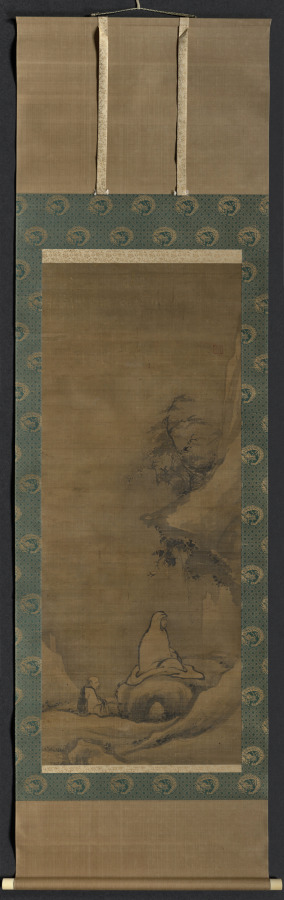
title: Bodhidharma Meditating Facing a Cliff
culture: China, Song dynasty (960-1279)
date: late 1200s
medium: Hanging scroll; ink on silk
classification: Painting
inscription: Spurious artist's seal of Yan Ciping 閻次平 [c. 1163–1189]. WKH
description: Bodhidharma is the legendary founder of Chan (Zen) Buddhism in China. Here he is seen meditating in front of a cliff, atop Mount Song. Behind him is his disciple Huike, the first recipient of his teaching.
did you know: Rough and calligraphic brushwork for landscape and drapery contrasts with more psychologically penetrating representation of the two protagonists' faces.